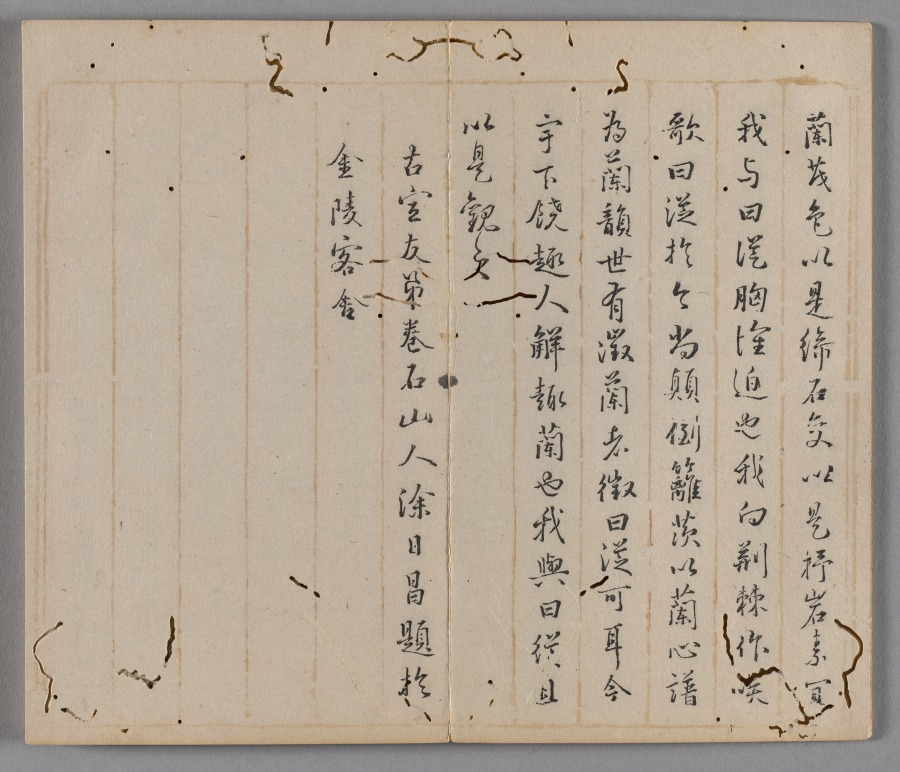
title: Ten Bamboo Studio Painting and Calligraphy Handbook (Shizhuzhai shuhua pu): Orchids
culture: China, Qing dynasty (1644-1911)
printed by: Hu Zhengyan (Chinese, c. 1584–1674)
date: 1633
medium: Woodblock-printed book; ink and colors on paper; first edition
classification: Print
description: Color printing reached a level of perfection in the early 1600s, as seen in this Ten Bamboo Studio Collection of Calligraphy and Painting and the Mustard Seed Garden Manual of Painting (printed 1679 and 1701). The painterly quality, precision in registering (aligning) the woodblocks, and harmonious colors made them the most successful color print editions in Chinese history. Both editions were printed and compiled in Nanjing, spread nationwide, and had a great impact on the arts in Japan and Korea.